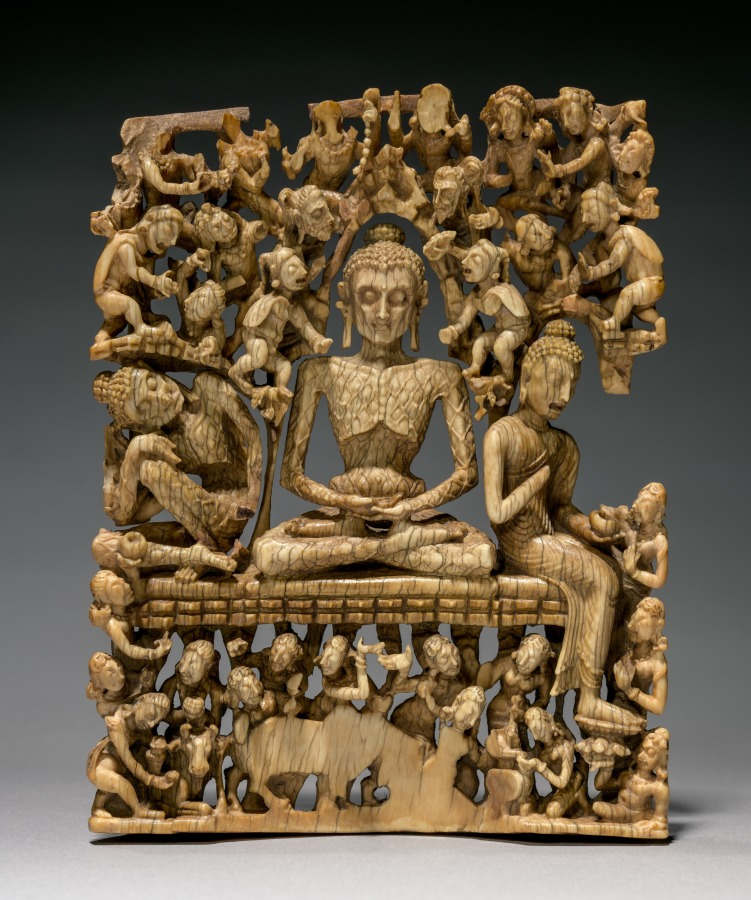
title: Fasting Buddha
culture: India, Kashmir, 8th century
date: 700s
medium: ivory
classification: Ivory